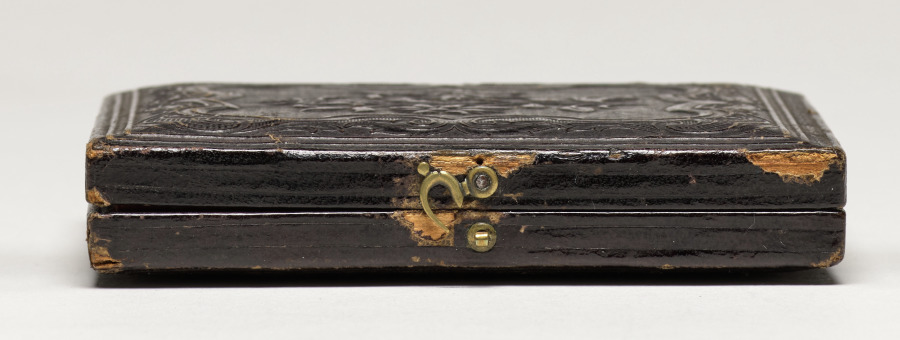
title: Boy with Cigar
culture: America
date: c. 1855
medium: daguerreotype, tinted, sixth plate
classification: Photograph